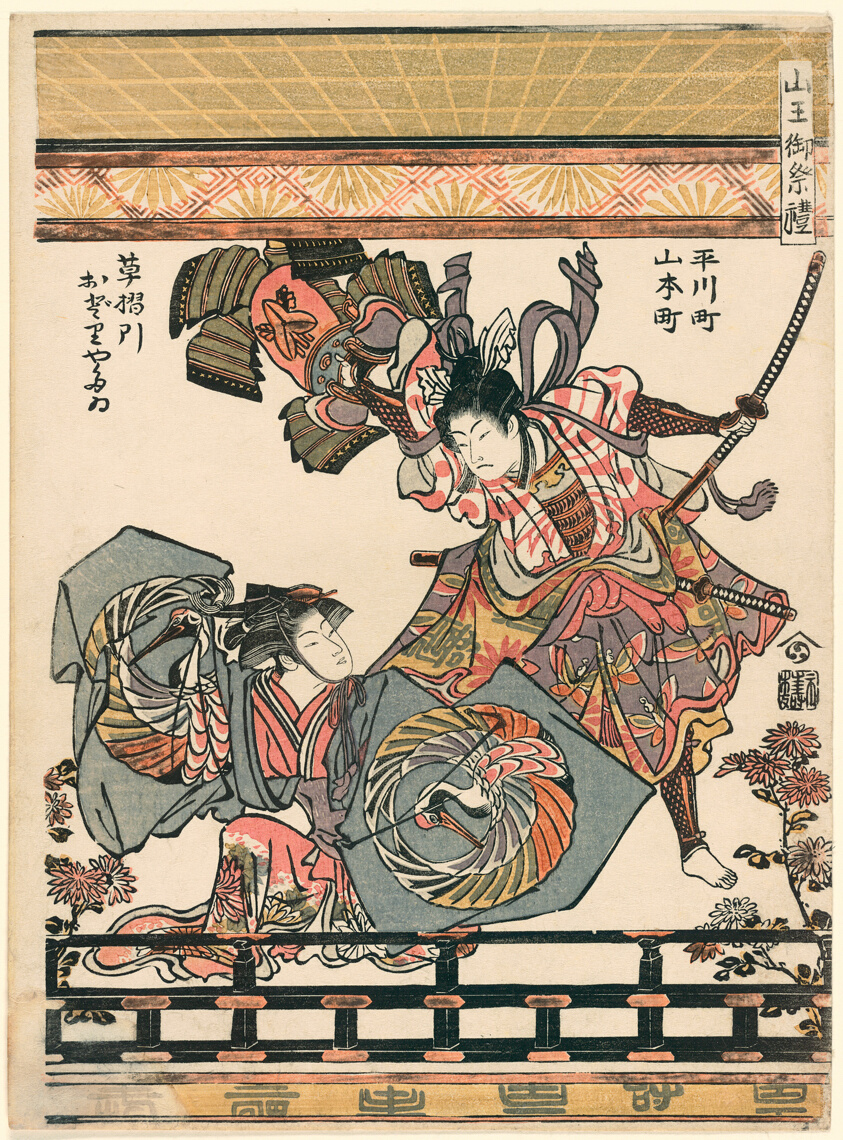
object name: Print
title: Actors Representing the Feat of Asahina Breaking the Armer of Soga no Goro (Hirakawa-cho Yamamoto-cho kusazuribiki odori yatai) from the series The Festival of the Sanno Shrine (Sanno go-sairei)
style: Japanese (culture or style)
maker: Attributed to Torii Kiyonaga; Japanese, 1752-1815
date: 1780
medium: Color woodblock print; chuban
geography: Japan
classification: woodblock print; print; asian art